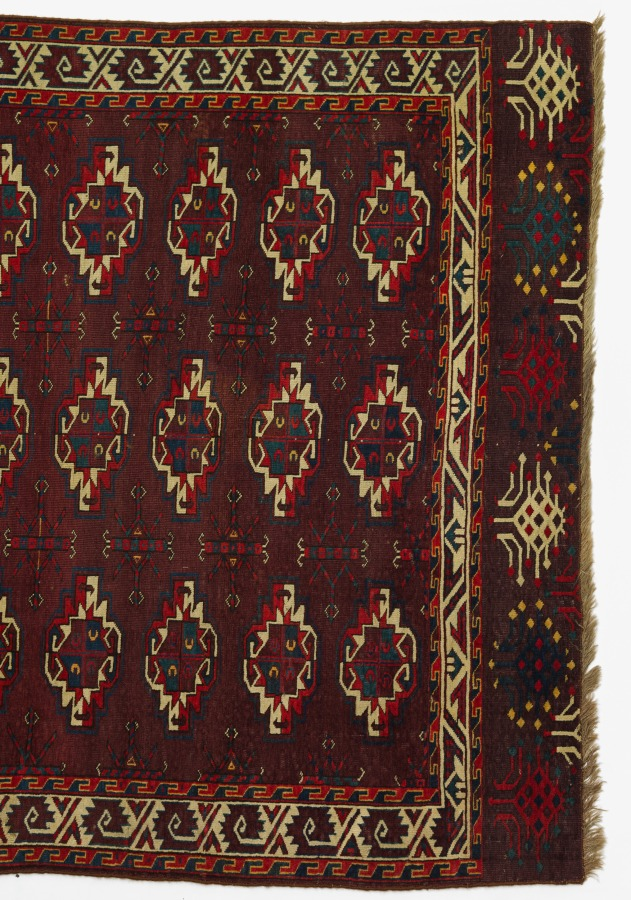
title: Turkmen Main Carpet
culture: Turkmenistan, Yomud tribe, 19th century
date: mid-1850s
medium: Wool, knotted pile, 128-136 symmetrical knots per square inch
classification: Carpet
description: In the Islamic world, carpets symbolize status and wealth. A carpet’s origin can be identified by its design, color, and technique. Shades of red and lobed motifs, or guls, are hallmarks of Turkmen carpets woven by nomadic tribes across northeast Iran, Afghanistan, and central Asia. This main carpet of the Yomud tribe features beautiful colors in the guls on a rich aubergine ground; the decorated skirts, or elem, with stylized flora at each end, are its rarest feature. This carpet would have been the prized possession within the living quarters of a round tent, or yurt.